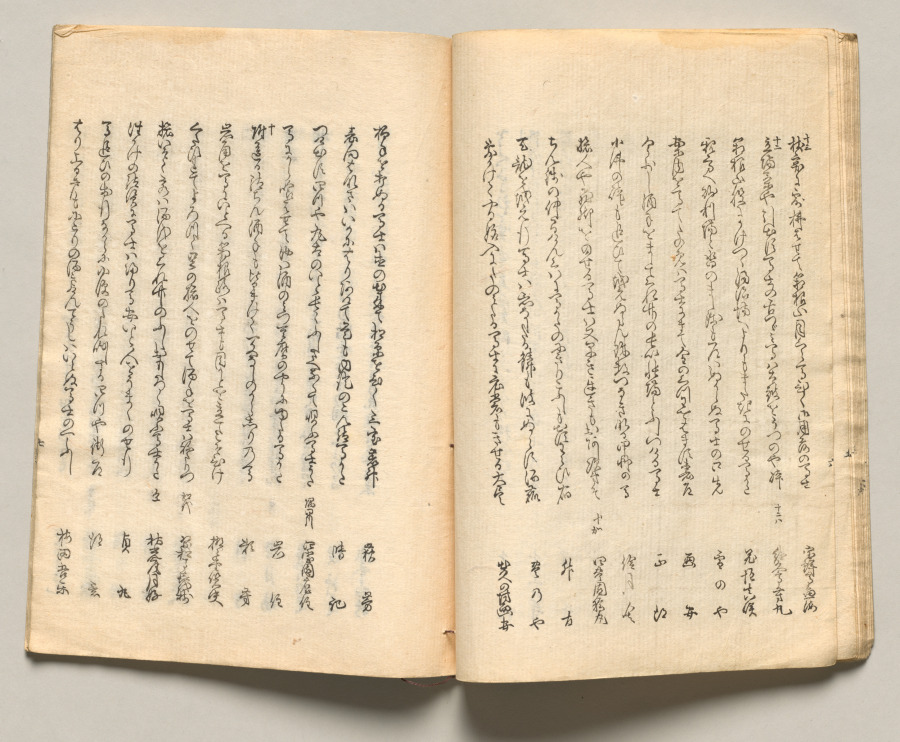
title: Spread Fourteen from Volume Five of People of Japan in Light Verse (Kyōka)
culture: Japan, Edo period (1615–1868)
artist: Utagawa Hiroshige (Japanese, 1797–1858)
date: 1857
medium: Woodblock-printed book; ink and color on paper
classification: Bound Volume